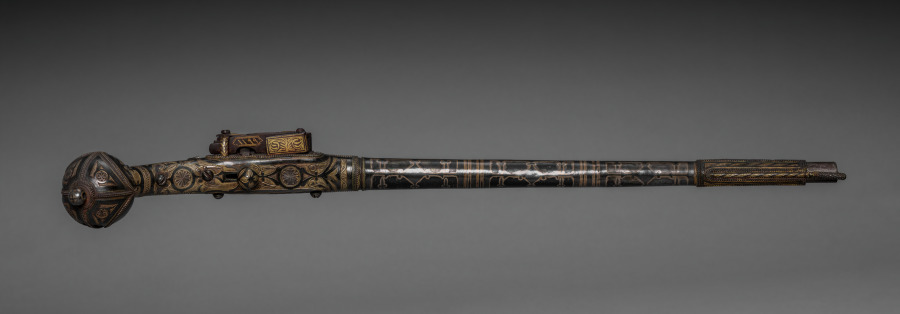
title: Ball-Butted Miquelet-Lock Pistol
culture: Caucasus, Daghestan, 19th century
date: c. 1850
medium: steel, brass, silver; gold inlay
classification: Arms and Armor